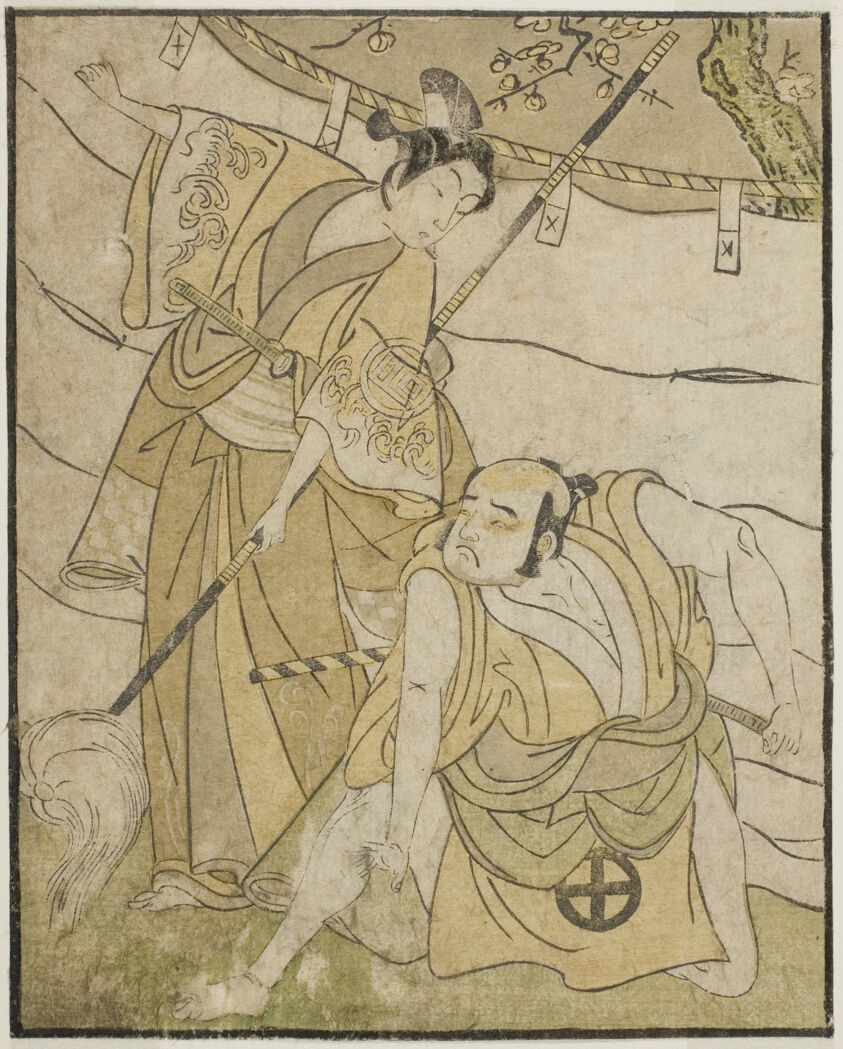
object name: Print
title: The Actors Otani Tomoemon I as Emohei (right), and Sanogawa Ichimatsu II as Sanada Yoichi (left), in the Play Myoto-giku Izu no Kisewata, Performed at the Ichimura Theater in the Eleventh Month, 1770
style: Japanese (culture or style)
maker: Katsukawa Shunsho 勝川 春章; Japanese, 1726-1792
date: c. 1772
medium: Color woodblock print; from the illustrated book Yakusha Kuni no Hana (Prominent Actors of Japan)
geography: Japan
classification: woodblock print; print; asian art